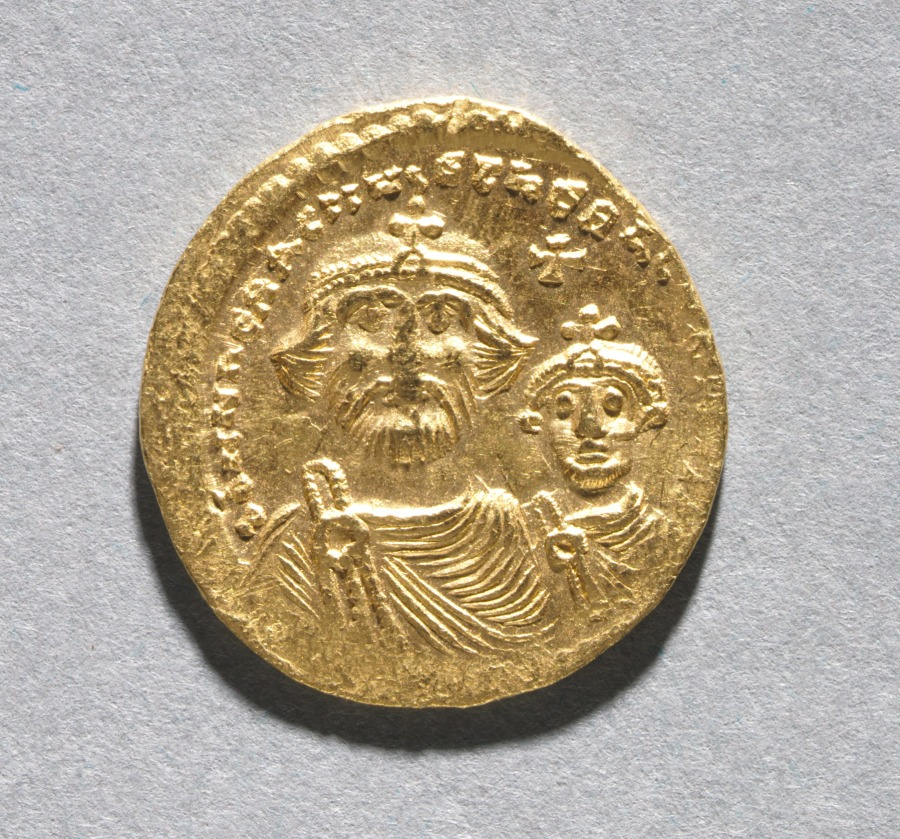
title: Solidus with Heraclius and his Son Heraclius Constantine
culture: Byzantium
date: c. 616–625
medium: gold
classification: Coins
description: Byzantine Gold Coins The vast number of surviving Byzantine coins attests to the level of trade across the empire. Controlled and supervised by the emperor, the producers of coins took care to represent his authority and reflect his stature. Talented artists were recruited to engrave the dies (molds) used for the striking of coins. Emperors increasingly came to include their heirs and co-emperors on their coinage, as well as other family members or even earlier rulers. Coins were recognized, then as now, as small, portable works of art. With their inscriptions and images, Byzantine coins provide valuable documentation of historical events and a record of the physical appearance of the emperors. The solidus is the basic gold coin of 24 karats; the tremissis, a gold coin of one-third the weight and value of the solidus; and the nomisma, which in the 10th century replaced the solidus as the standard gold coin.